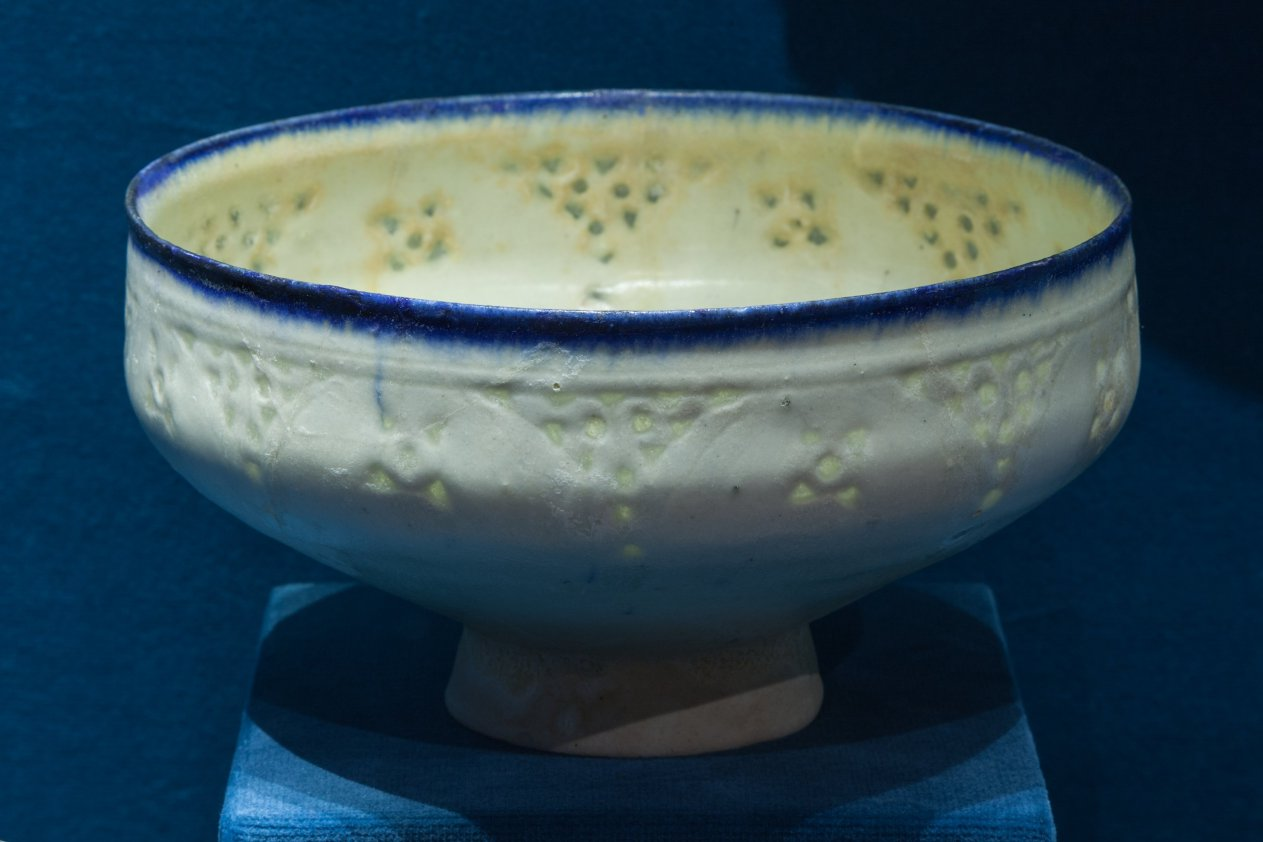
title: Footed Bowl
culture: Iran, probably Kashan, Seljuq period, late 12-early 13th century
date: late 1100s–early 1200s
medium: fritware, pierced and underglaze painting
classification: Ceramic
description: Iranian potters created transparency by piercing and glazing frit-body walls. Here, triangles and rosettes decorate incised scallops beneath the blue rim. The footed shape is derived from Iranian metal bowls.